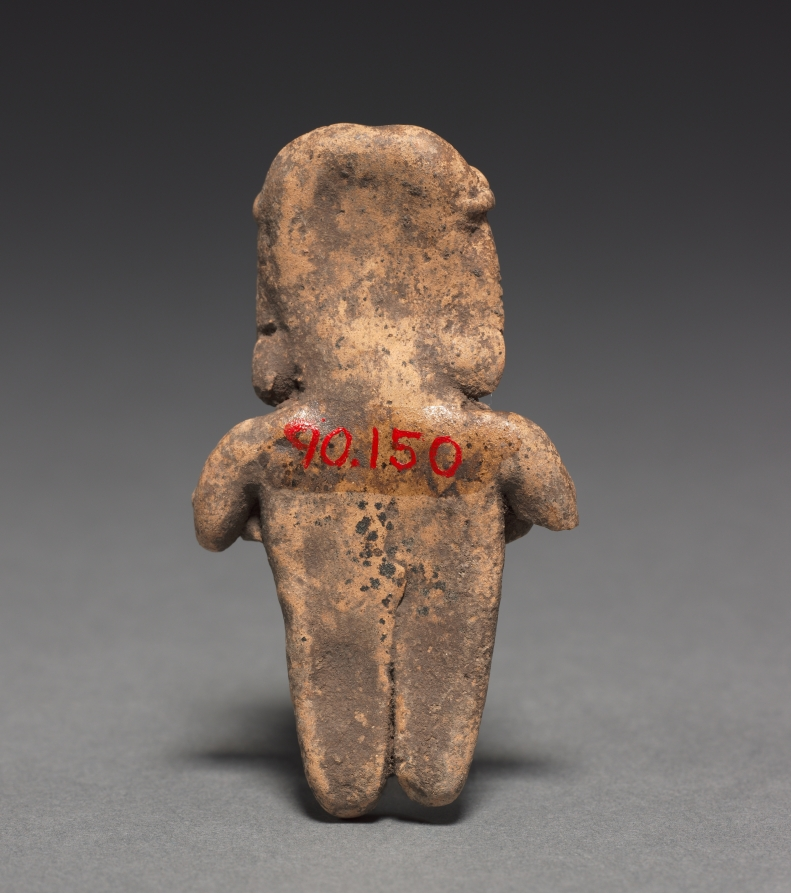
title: Female Figurine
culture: Mesoamerica, Mexico, Guanajuato, Chupícuaro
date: 400–100 BCE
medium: pottery with traces of white and red pigment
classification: Sculpture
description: The Chupícuaro culture, located north of Mexico City in the state of Guanajuato, created a distinctive ceramic tradition including small clay figurines. This example is said to belong to a group of ten figurines from the same burial or cache (1990.145–154). The group includes both males and females that can be sorted into couples based on size.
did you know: Groups of figurines were sometimes arranged in scenes and likely used in household rituals.